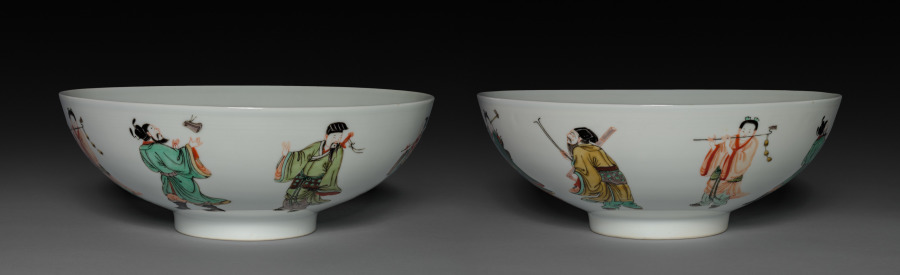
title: Pair of Bowls with Eight Immortals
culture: China, Jiangxi province, Jingdezhen kilns, Qing dynasty (1644-1911), Kangxi reign (1662-1722)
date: 1662–1722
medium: porcelain with famille verte overglaze enamel decoration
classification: Ceramic